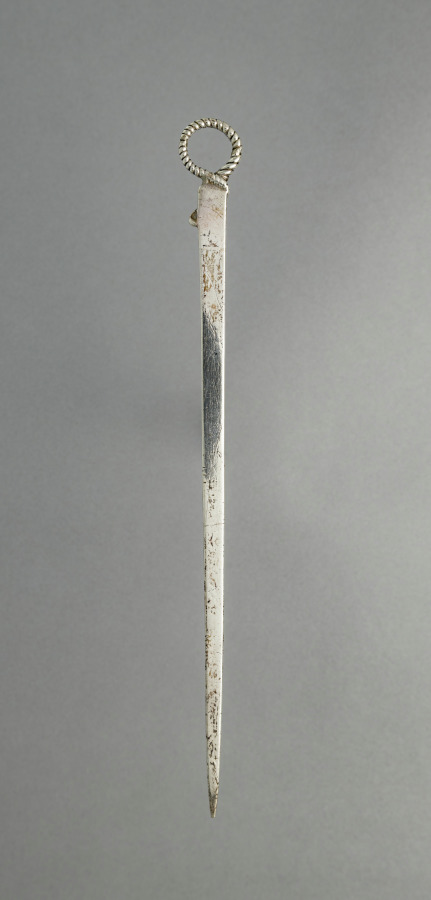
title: Skewer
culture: England, London, 18th century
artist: firm of Charles Wright (British)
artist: firm of Thomas Whipham (British)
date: 1762–1763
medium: silver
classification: Silver